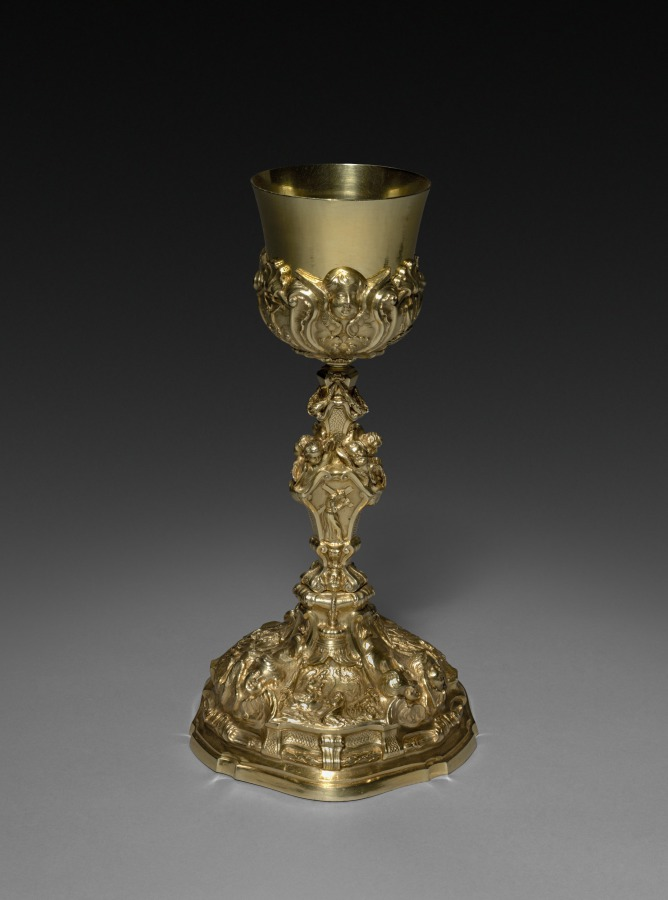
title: Chalice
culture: Spain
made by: Antonio Lopez (Spanish)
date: 1732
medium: silver gilt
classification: Metalwork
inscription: engraved on base: "Sobrado" (Monastery-N.W. Spain).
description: To make this chalice, Antonio Lopez probably worked from a drawn or printed design. The vessel features seraphim, the highest order of angels, interspersed with scrolling vignettes of scenes from Christ’s suffering and death. The etched “Sobrado” on the base suggests that the chalice may have once been used to celebrate Catholic Mass at the Cistercian abbey church of Sobrado in northwest Spain.